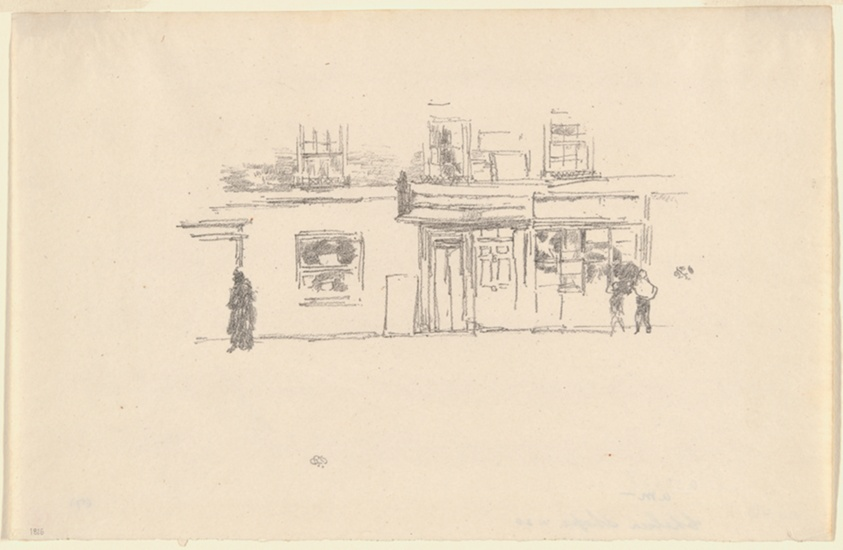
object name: Print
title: Chelsea Shops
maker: James McNeill Whistler (American, 1834-1903)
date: 1888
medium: Transfer lithograph in black ink on ivory laid paper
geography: United States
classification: transfer lithograph; lithograph; print; prints and drawing; paper